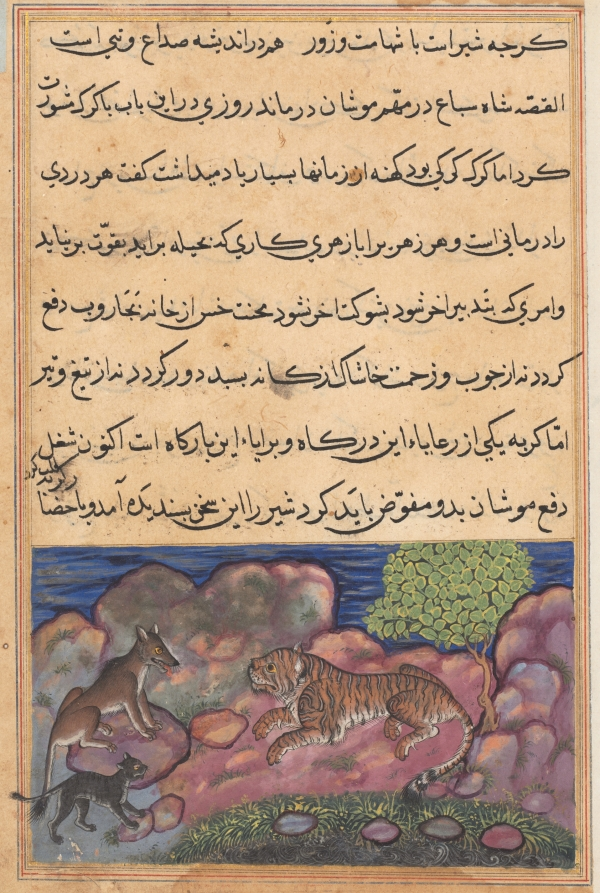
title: The wolf advises the lion to consult the cat, from a Tuti-nama (Tales of a Parrot): Fifteenth Night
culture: Mughal India, court of Akbar (reigned 1556–1605)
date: c. 1560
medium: gum tempera, ink, and gold on paper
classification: Painting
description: The painting depicts an old tiger, crouching under a tree by a stream looking plaintively at a wolf, with whom he has just shared his troubles with the mice. The wolf suggested that the cat be called to eliminate the mice. The cat has dutifully arrived and requests that he be given the position of Magistrate of the Court, to which the lion agreed. The cat instilled fear in the mice; they dispersed, and the lion was content. Wisely, however, the cat treated the mice with consideration and did not exterminate them completely, so that he would not eliminate the cause of his usefulness. Although the rocky landscape is heavily shaded in a technique that gives them a soft quality, and the leaves of the tree are each outlined in gold, the lack of any actual shadows from an identifiable light source provides a timeless appearance to the scene.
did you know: The same word is used in Persian for both “lion” and “tiger.”